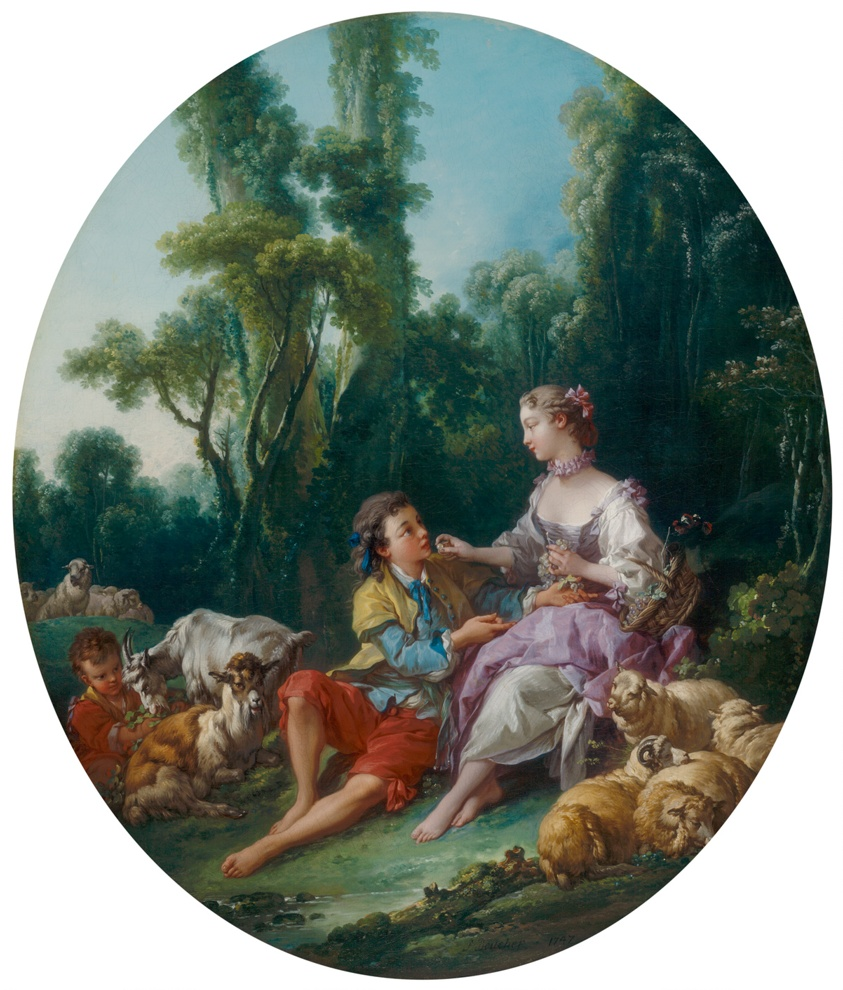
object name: Painting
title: Are They Thinking about the Grape? (Pensent-ils au raisin?)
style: 18th Century, Rococo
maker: François Boucher (French, 1703–1770)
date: 1747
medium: Oil on canvas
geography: France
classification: oil on canvas; oil paintings (visual works); paint; french; painting; european painting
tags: love, animals, children, figures, food, goats, grapes, landscape, man, river, sex, sheep, trees, water, woman